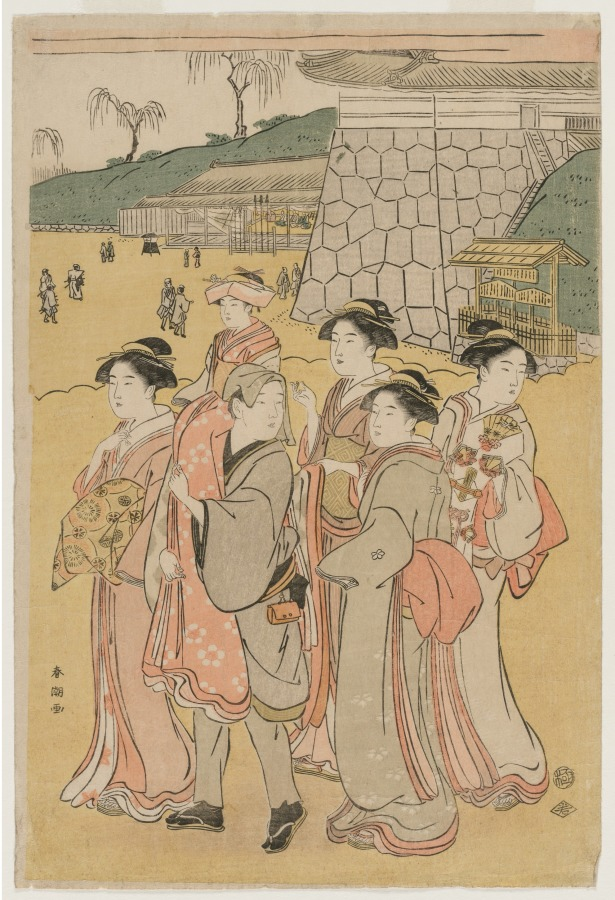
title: Women Accompanying a Girl to a Shrine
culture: Japan, Edo period (1615–1868)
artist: Katsukawa Shunchō (Japanese)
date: early 1790s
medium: color woodblock print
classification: Print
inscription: Signature: Shuncho ga Publisher: Wakasaya Yoichi Waka Censhorship Seal: kiwame